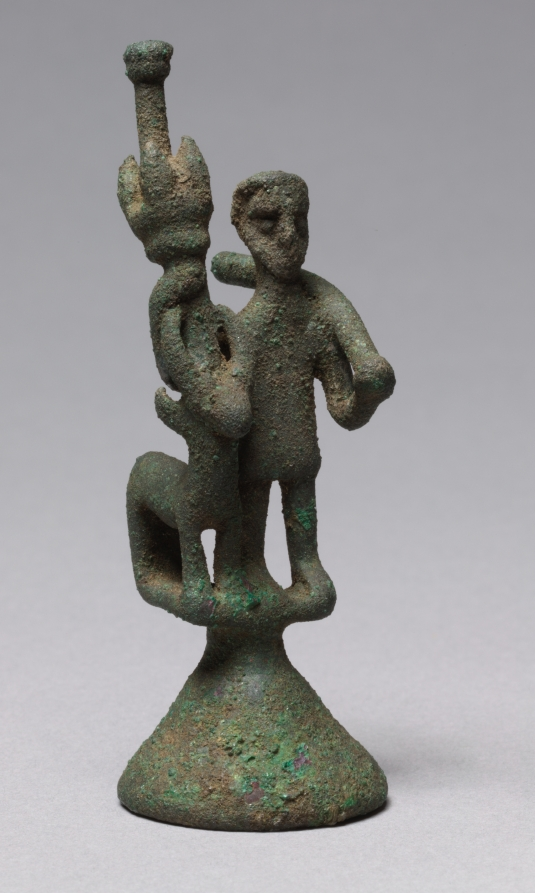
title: Warrior and Bull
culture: Sardinia, probably Nuragic culture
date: c. 800–500 BCE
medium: bronze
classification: Sculpture